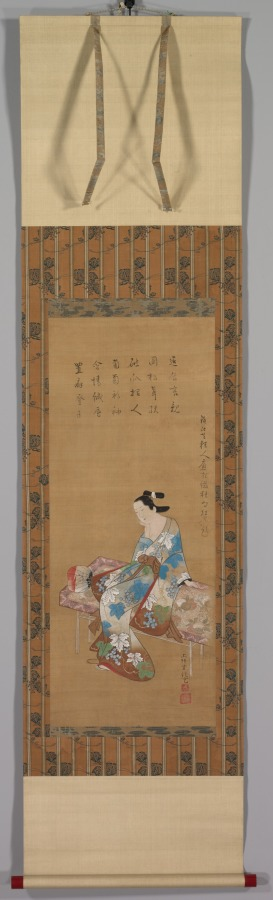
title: Courtesan Seated on a Bench Enjoying the Evening Cool in Summer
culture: Japan, Edo period (1615–1868)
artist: Kamigaki Hōryū (Japanese, dates unknown)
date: 1615–1868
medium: hanging scroll, ink and color on silk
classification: Painting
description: In a pensive pose with her chin resting in her hand, a courtesan is seated on a wooden bench that extends diagonally across the lower half of the scroll. Her open robe suggests that it is a warm evening-perhaps late summer or early fall, as indicated by the grapevine pattern on her kimono. The floral patterns in the composition hint at the seasons: the plum blossom on the fan for spring; grape pattern on the robe for late summer; and chrysanthemum design on the bench indicating autumn. Note also how the grapevine pattern in the painting's mounting mimics the design of her kimono. The overall mood is one of intimacy, created by Hõryþ through the delicate rendering of the courtesan's facial features and hands. In contrast to the other scrolls of beauties nearby, the artist here portrayed his subject with little background, allowing her grace and elegance to carry the picture.